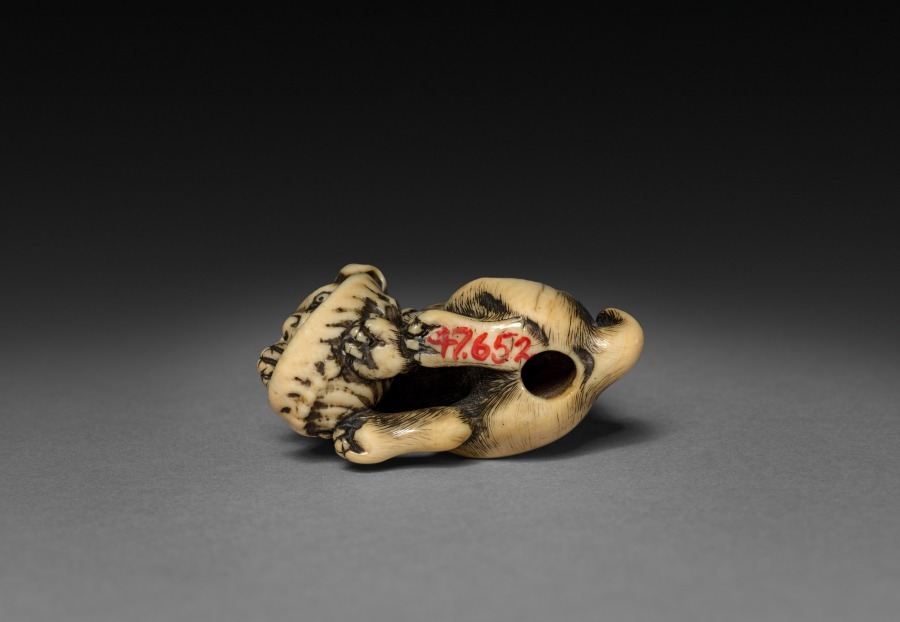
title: Dog with Shell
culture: Japan, Edo period (1615–1868)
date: 1700s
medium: ivory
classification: Netsuke